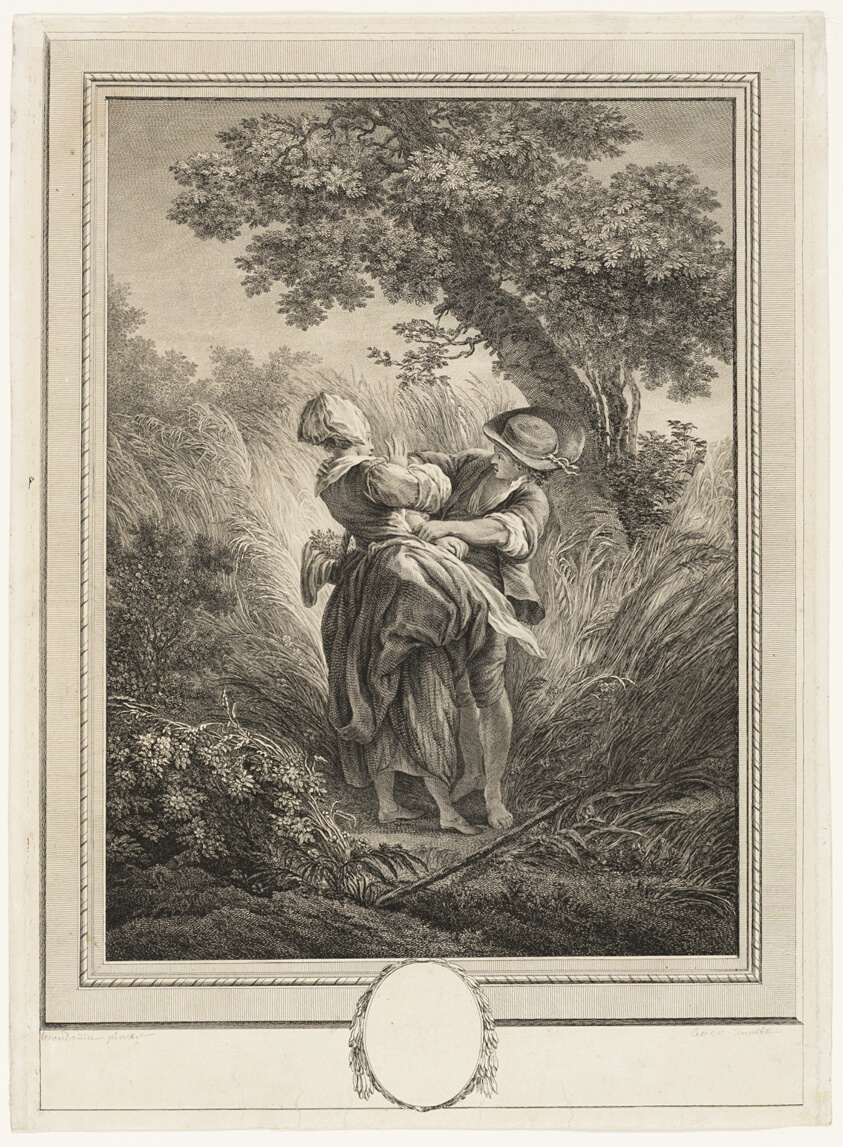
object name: Print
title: Dangerous Encounter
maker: Jean Jacques Andre Le Veau (French, 1729-1785); after Pierre Antoine Baudouin (French, 1723-1769)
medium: Etching on ivory paper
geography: France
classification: etching; print; prints and drawing